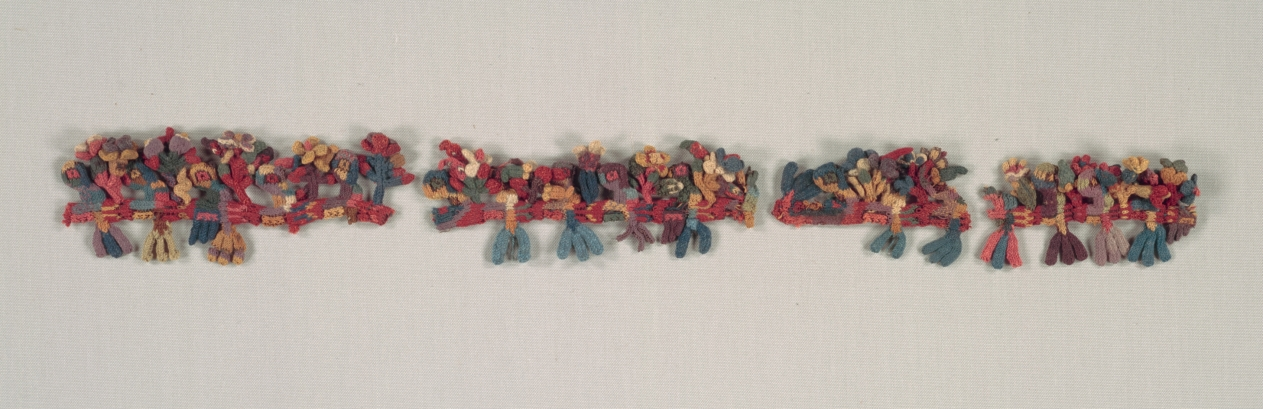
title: Border Fragment with Birds and Flowers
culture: Peru, South Coast, Nasca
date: 100 BCE–700 CE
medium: camelid fiber, cross-knit looping (reversible)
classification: Embroidery